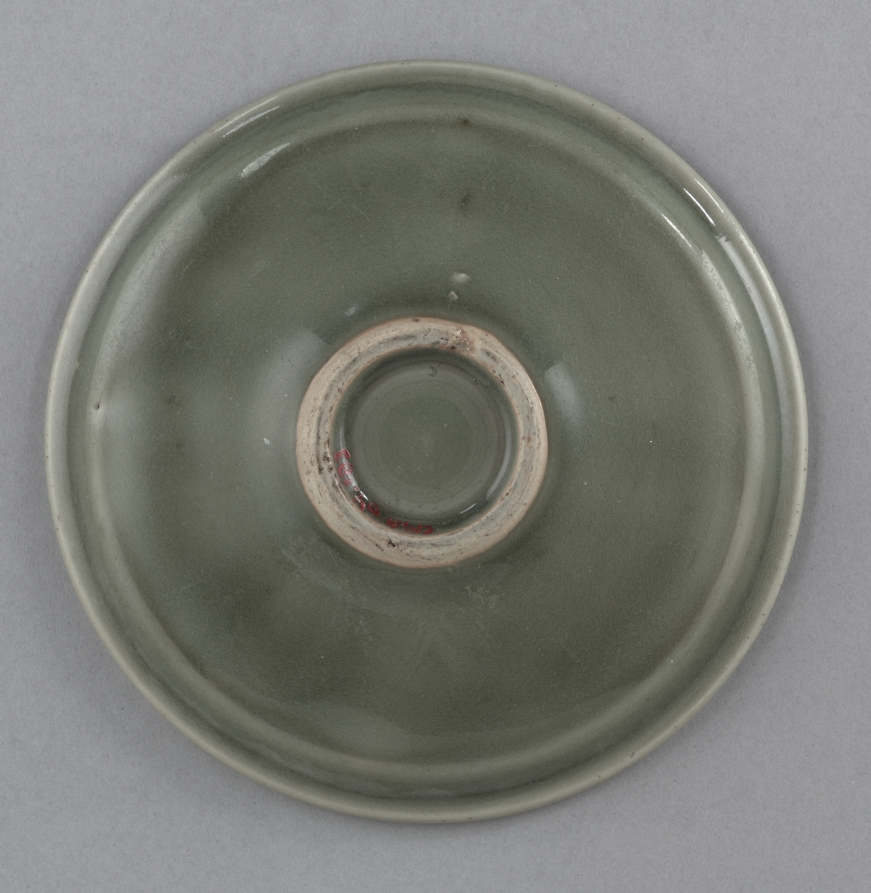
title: Dish with Two Dragons in Relief: Longquan Ware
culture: China, Zhejiang province, Yuan dynasty (1271-1368)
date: 14th Century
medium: glazed porcelain with unglazed molded decoration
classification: Ceramic